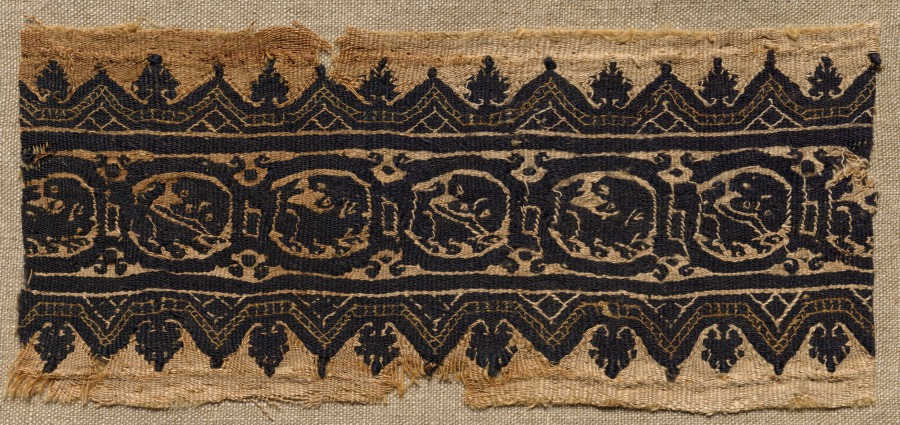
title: Fragment, Probably Part of a Clavus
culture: Egypt, Byzantine period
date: 400s - 600s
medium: tapestry; wool and linen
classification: Textile